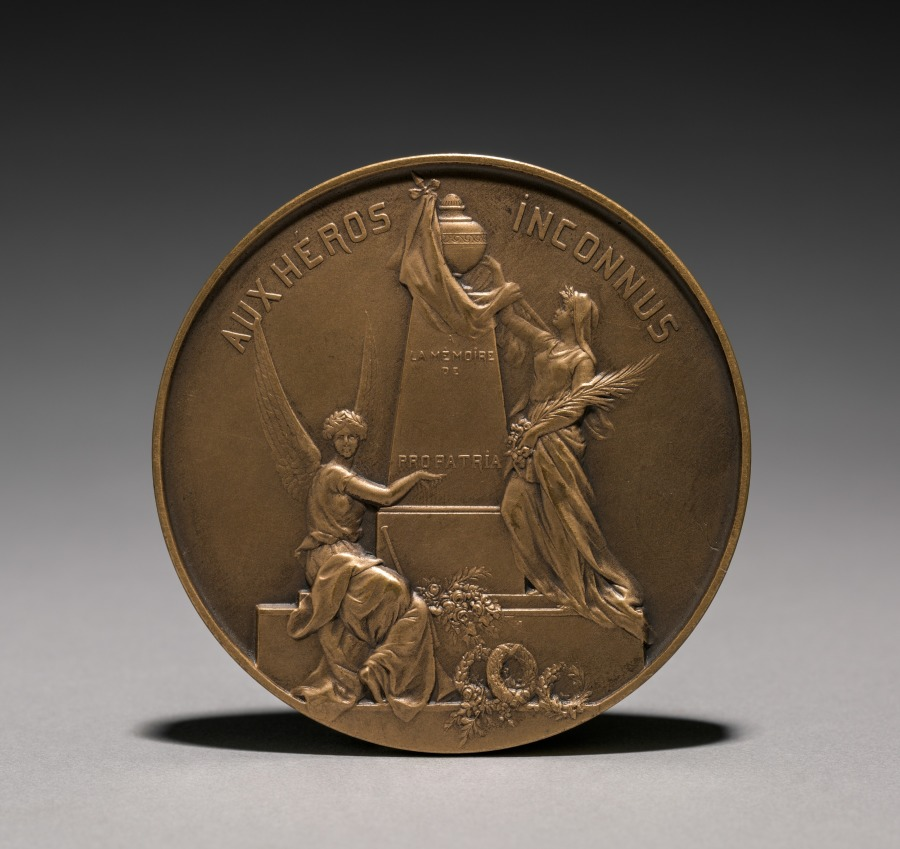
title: Medallion (reverse)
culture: France, 19th-20th century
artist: Henri Emile Allouard (French, 1844–1929)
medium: bronze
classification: Metalwork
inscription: "Pour la France. Pour l'humanite."